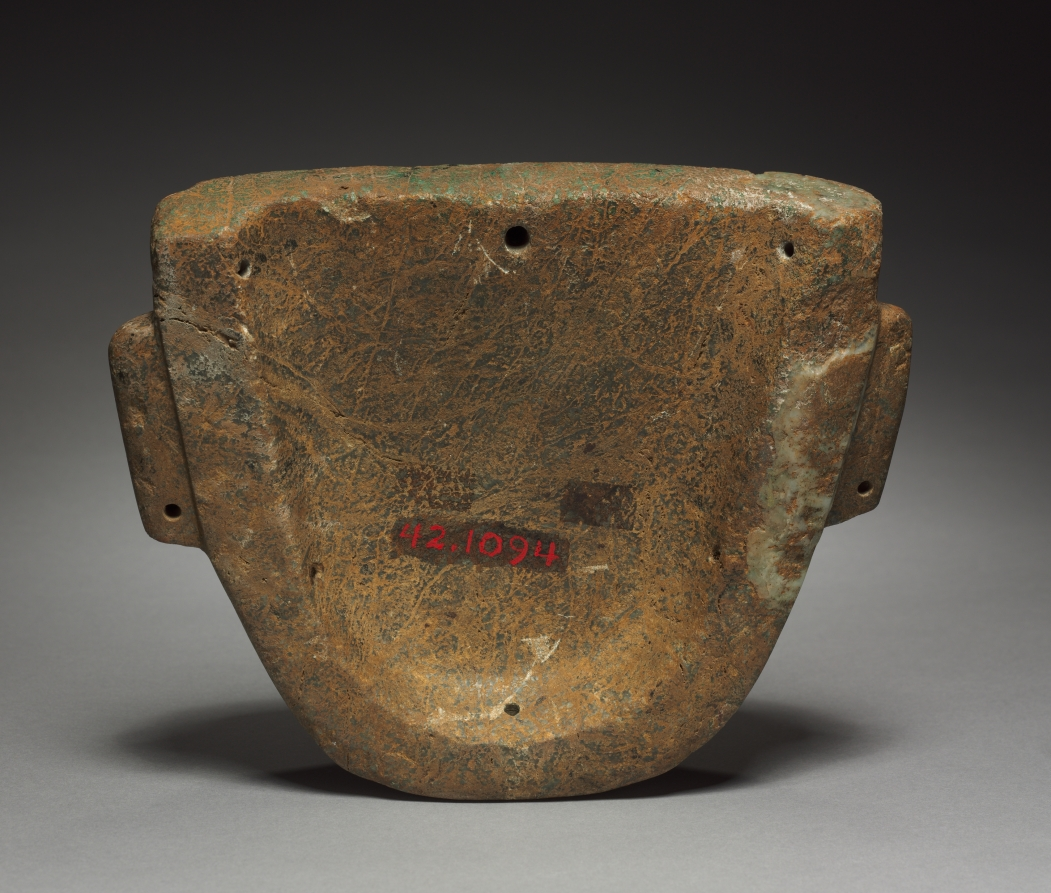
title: Mask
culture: Central Mexico, Teotihuacán, Classic period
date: 1–550 CE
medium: greenstone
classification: Stone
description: Many Teotihuacán masks were once tied to something via holes on the back--perhaps a body-shaped form dressed in garments, ornaments, and a headdress that identified the figure. The stone masks’ eyes and mouths once held inlays representing irises, pupils, and teeth.